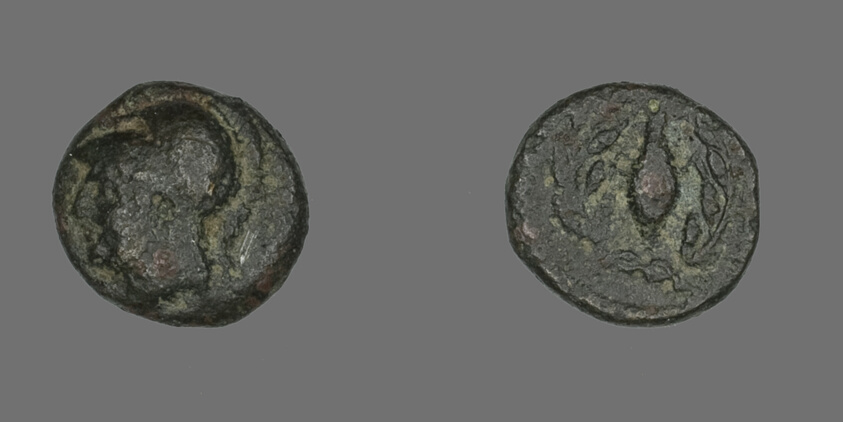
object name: Coin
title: Coin Depicting the Goddess Athena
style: greek, ancient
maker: Greek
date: after 340 BCE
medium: Bronze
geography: Ancient Greece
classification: coin; ancient art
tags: goddesses, Athena